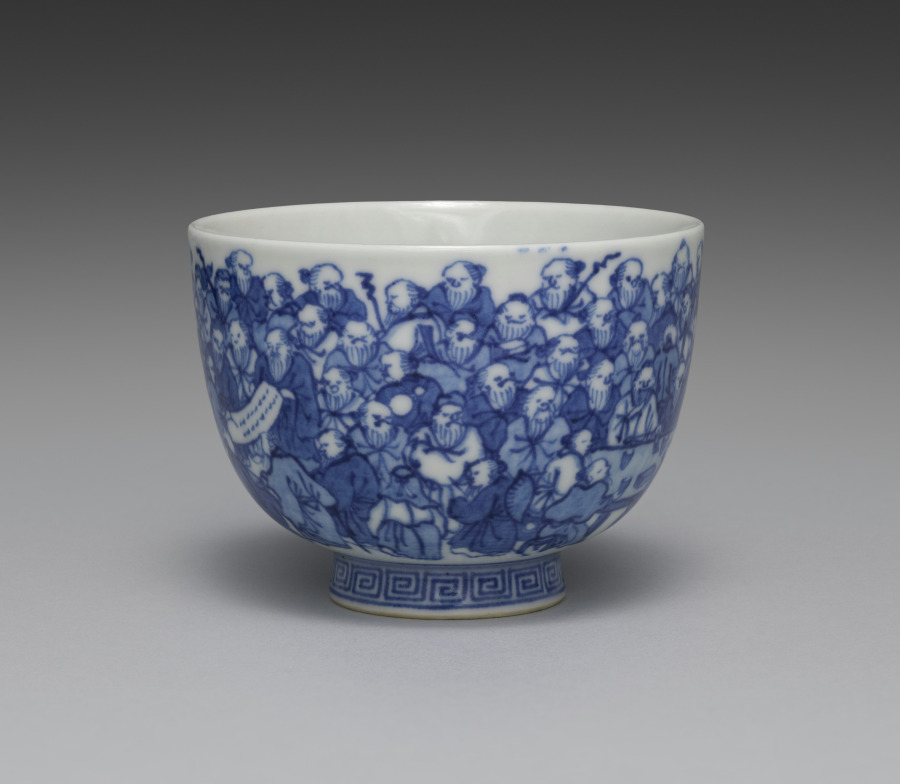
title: Teacup from Teacups with a Hundred Sages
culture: Japan, Meiji period (1868–1912)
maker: Seifū Yohei III (Japanese, 1851–1914)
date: 1893–1914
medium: One from a set of five teacups; porcelain with underglaze blue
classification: Ceramic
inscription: 清風造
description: Each of these five teacups has a painting of identical design in underglaze blue, but as the tiny figures are drawn entirely by hand, each cup has its own personality. The theme of the sencha cups is an assembly of sages or immortals, literally “a hundred venerable [people]” (hyakurō). The myriad figures crowd the scene in groups. The god of longevity, with his tall forehead, sits with his cranes, having flown in from Mt. Penglai on the Isle of the Immortals. Seven long-bearded sages sit around a stone table, chatting and drinking; one is seated on an enormous gourd. Of course, there is a stack of books on the table, and elsewhere, scrolls are being written upon or read—in one case held very close by a sage who is wearing glasses. The design was enormously popular in ceramics made for those engaged in literati culture.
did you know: Seifū Yohei III (1851–1914) produced many works for tea gatherings where people drank Chinese-style leaf-tea (sencha).